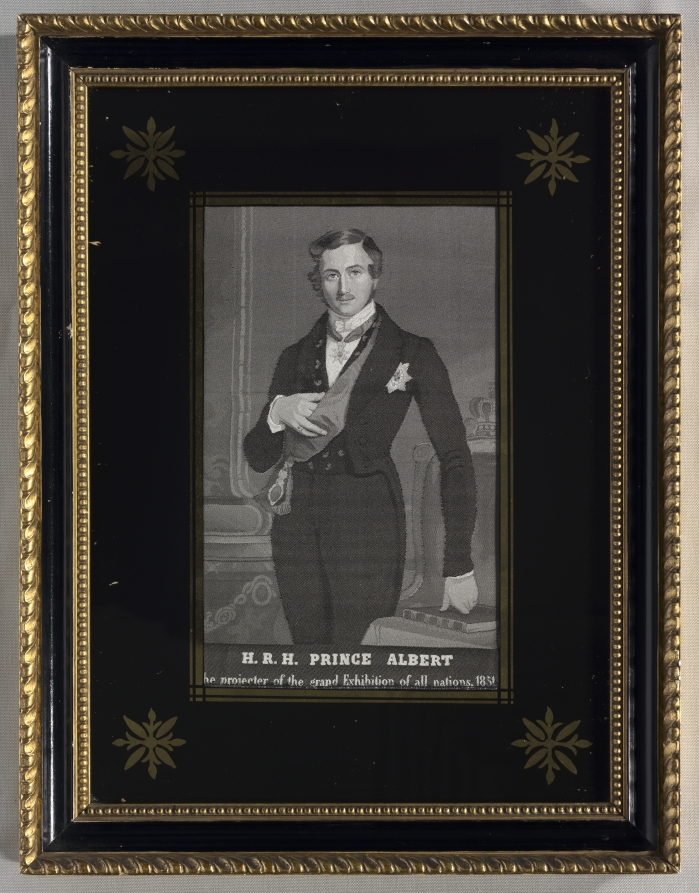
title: HRH Prince Albert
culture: England (?), early 20th century (?)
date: c. 1900–1925(?)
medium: jacquard weave; silk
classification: Textile